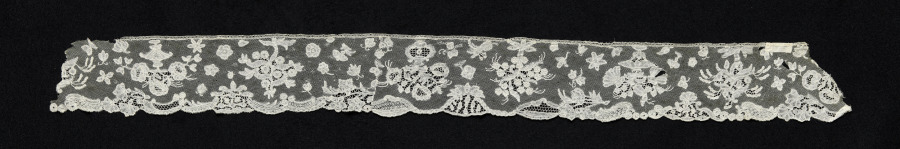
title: Lace Edging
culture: Belgium, Brussels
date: 1740–60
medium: Bobbin lace (Point d'Angleterre)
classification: Lace